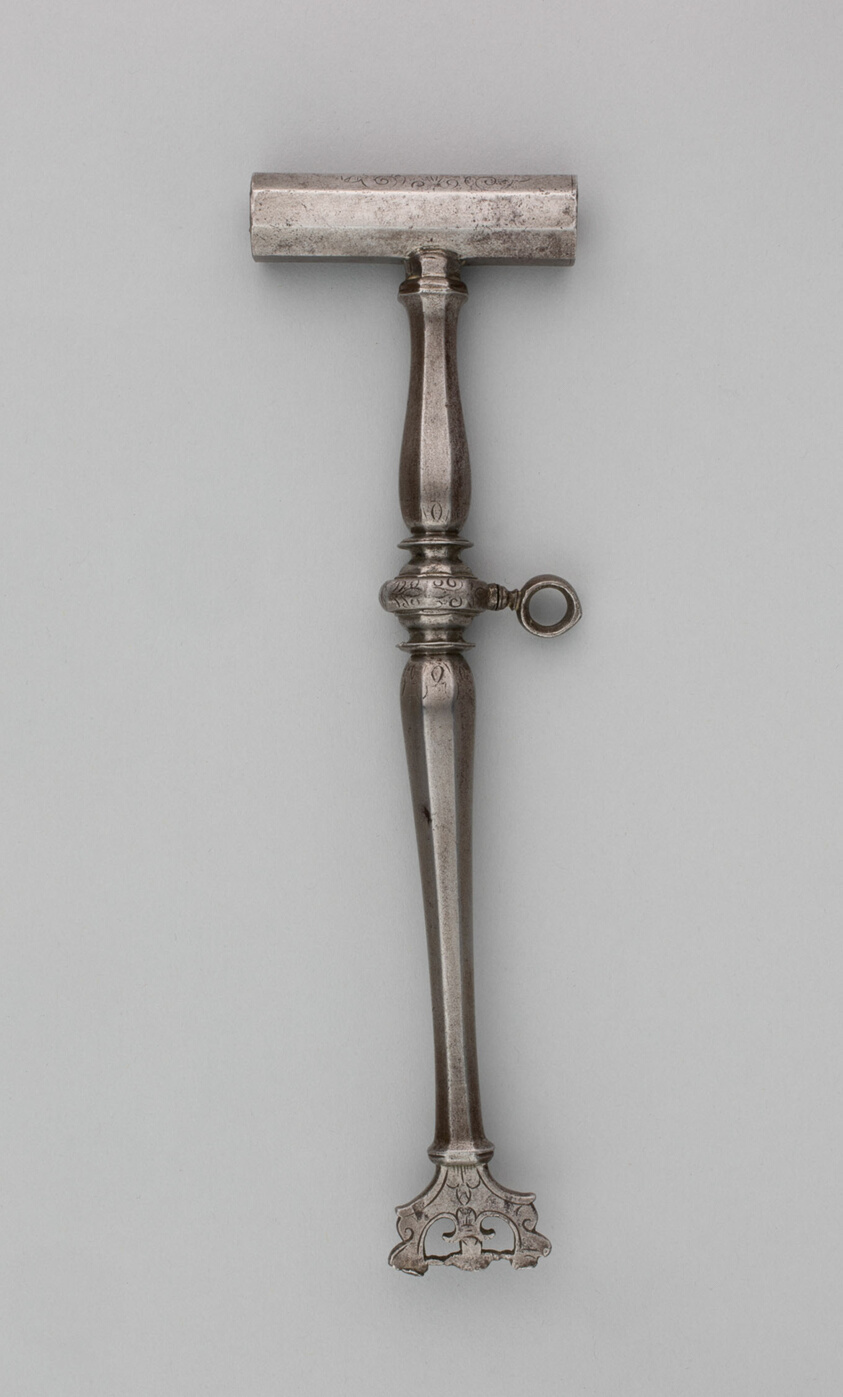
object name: Arms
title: Wheellock Spanner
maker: German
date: early 17th century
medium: Iron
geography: Germany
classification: firearm-accessory; arms; arms and armor